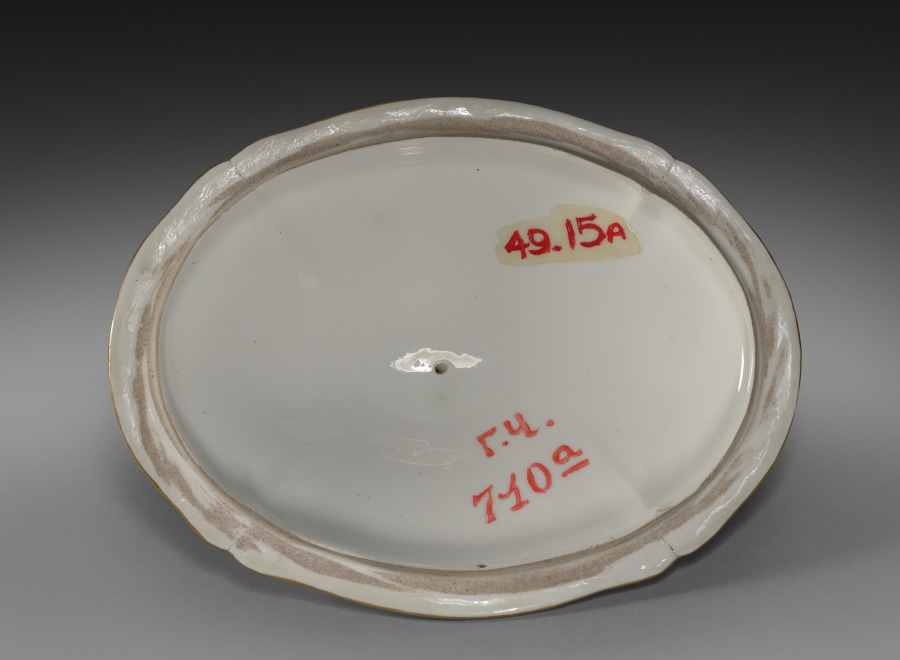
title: Cover for a Tureen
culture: France, Sèvres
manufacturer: Sèvres Porcelain Factory (French, est. 1756)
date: 1756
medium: soft-paste porcelainwith enamel and gilt decoration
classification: Ceramic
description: This tureen is probably from a service presented by Louis XV to King Frederick V of Denmark in 1758.